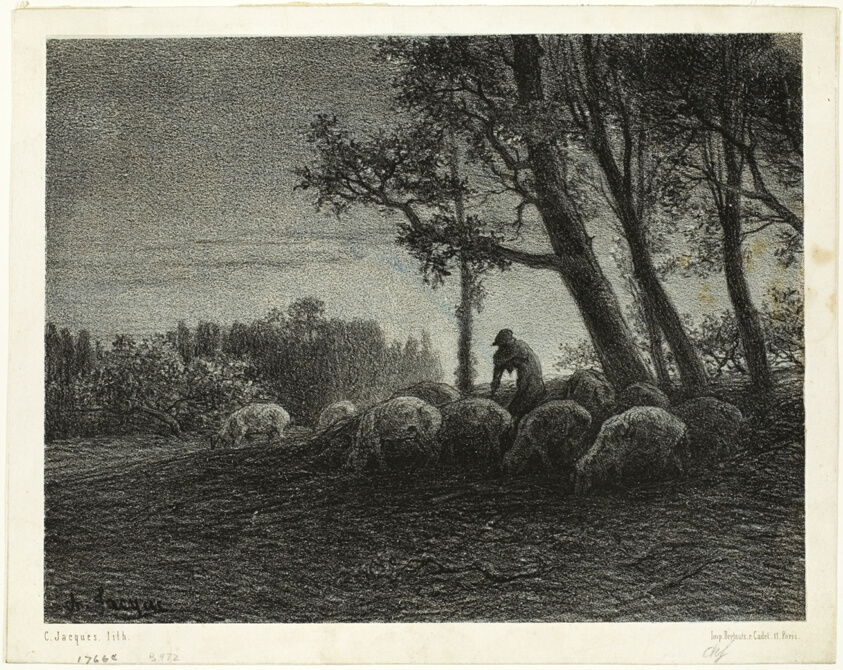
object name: Print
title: Poetic Twilight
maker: Charles Émile Jacque (French, 1813-1894); printed by Bertauts (French, 19th century)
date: c. 1853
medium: Lithograph in black on light gray China paper laid down on ivory wove paper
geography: France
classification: lithograph; print; prints and drawing